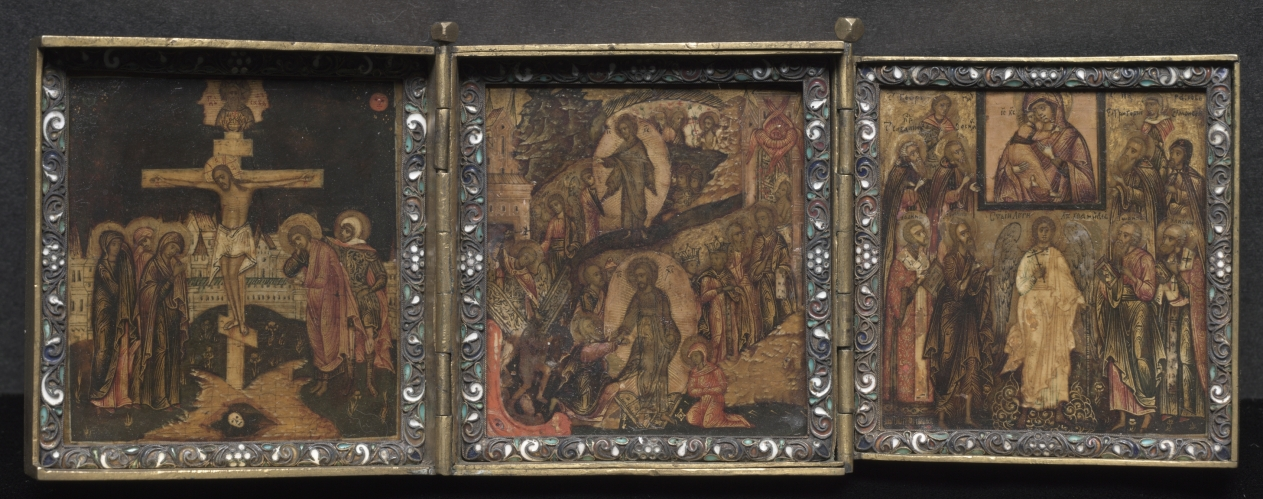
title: Portable Triptych Icon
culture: Byzantium, Russia, Moscow?, Byzantine period, 17th century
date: 1600s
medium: painted wood panel within enameled brass frame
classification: Painting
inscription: Inscribed throughout in traditional Church Russian (Church Slavonic) with names of prophets, saints, etc. Engraved on the outside of the brass frame is a cross with the symbols of the Passion, inscribed (top to bottom): The King of Glory; Jesus Christ; Victor; Lance (with which Christ was speared); Stick (tipped with acid to aggravate the wound); the initials R, B, M, L, G, G, standing for various personages represented in the paintings; and at the lower center, the Russian letters GA ("Golova Adama": Head of Adam). A scrap of paper was found behind the center panel, but it is damaged and very difficult to read. Professor A. Dean McKenzie of the University of Oregon, who translated the numerous inscriptions and identified the iconography of the panels, likewise examined the writing on the paper scrap and in a letter of January 29, 1979, said that it refers to two brothers: Ivan Dmitrievich, one of the brothers, apparently presented this icon as a gift to his younger brother.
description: This triptych icon was probably commissioned by a lay person for private prayer and meditation. It could be folded and shut when not in use. The scenes represented from left to right are: The Crucifixion (left); The Resurrection and Anastasis (center); and Adoration of the Miracle-Working Icon of the Vladimir Mother of God (right). Small portable icons such as this were common to later Russian religious practice.